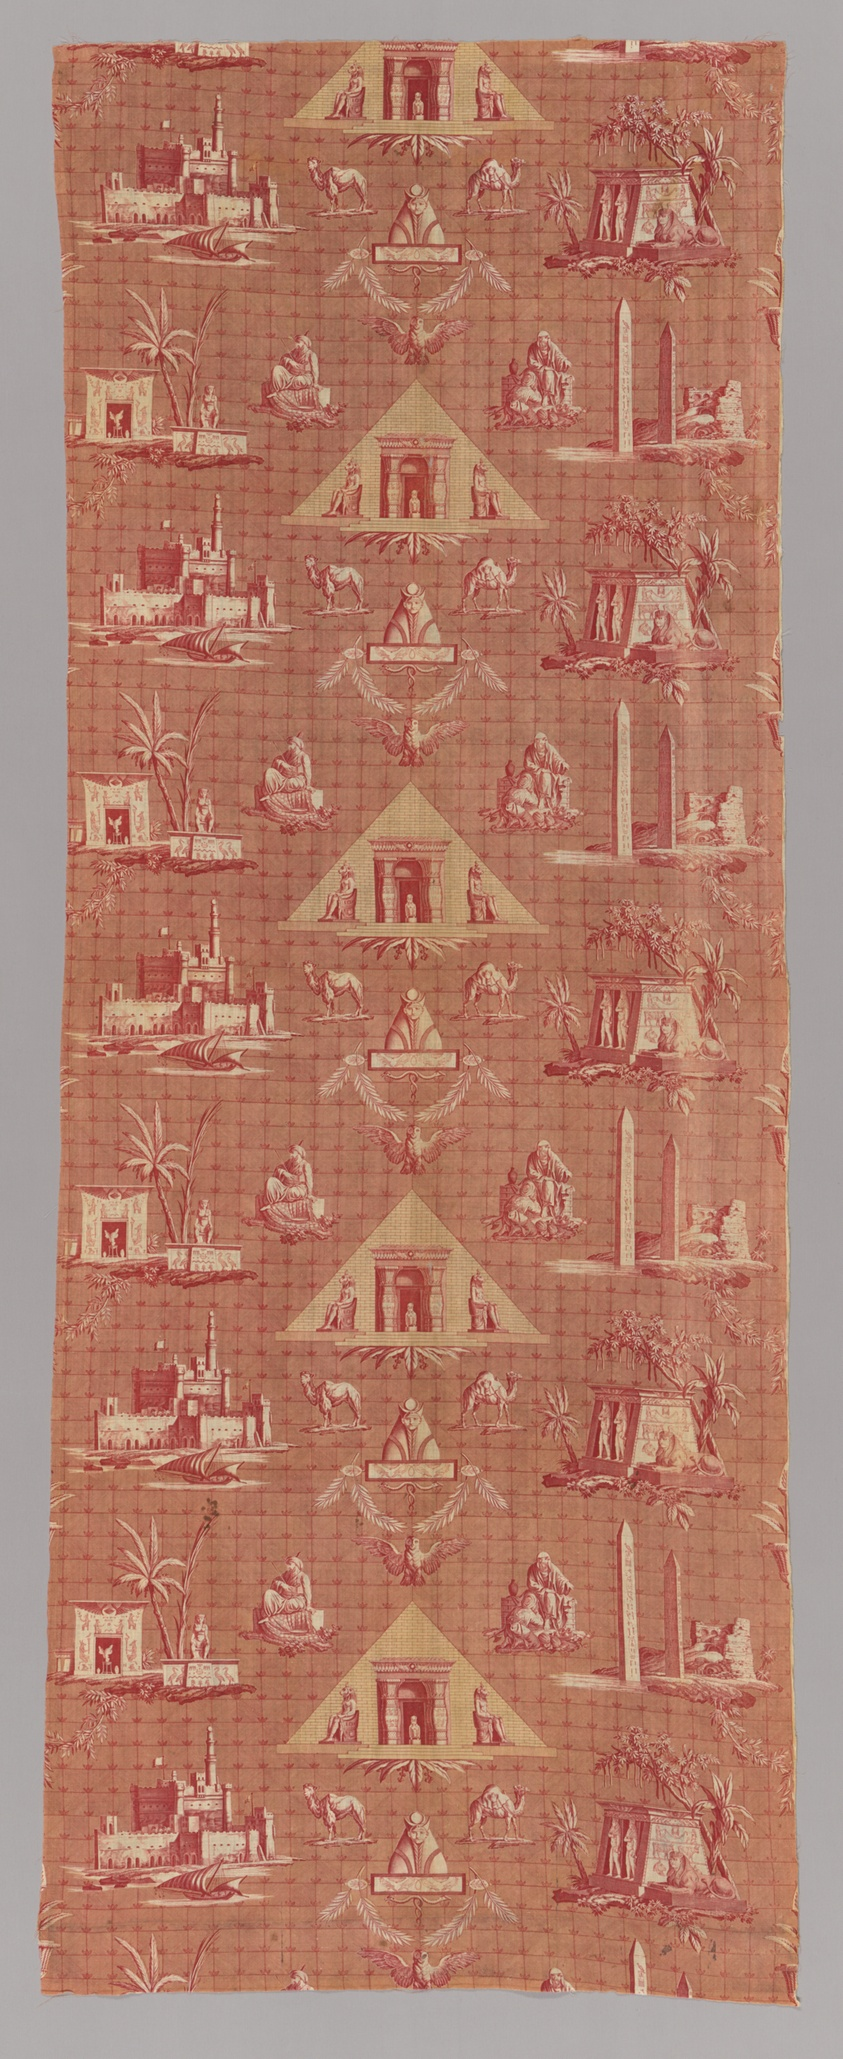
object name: Textile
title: Les Monuments d'Egypte (The Monuments of Egypt) (Furnishing Fabric)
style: egyptian revival, jouy-en-Josas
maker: Designed by Jean Baptiste Huet (French, 1745–1811) after engravings by Pagelet (French) and others after paintings by Louis François Cassas (French, 1756–1827); Manufactured by Christophe-Philippe Oberkampf (naturalized French, 1738-1815), Oberkampf Manufactory (French, 1760-1843); Jouy-en-Josas, France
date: c. 1800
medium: Cotton, plain weave; engraved roller and block printed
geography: Jouy-en-Josas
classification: weaving - printed; textile; furnishing textile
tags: Egypt, buildings, sphinxes, cleopatra, obelisks, statues, pyramid, animals